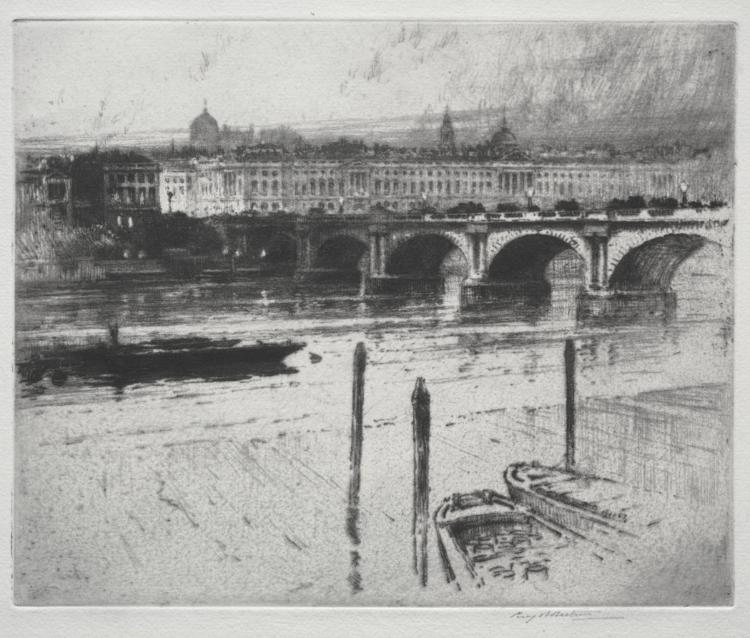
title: Waterloo Bridge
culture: England, 19th-20th century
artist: Percy Robertson (British, 1868–1934)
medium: etching and aquatint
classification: Print